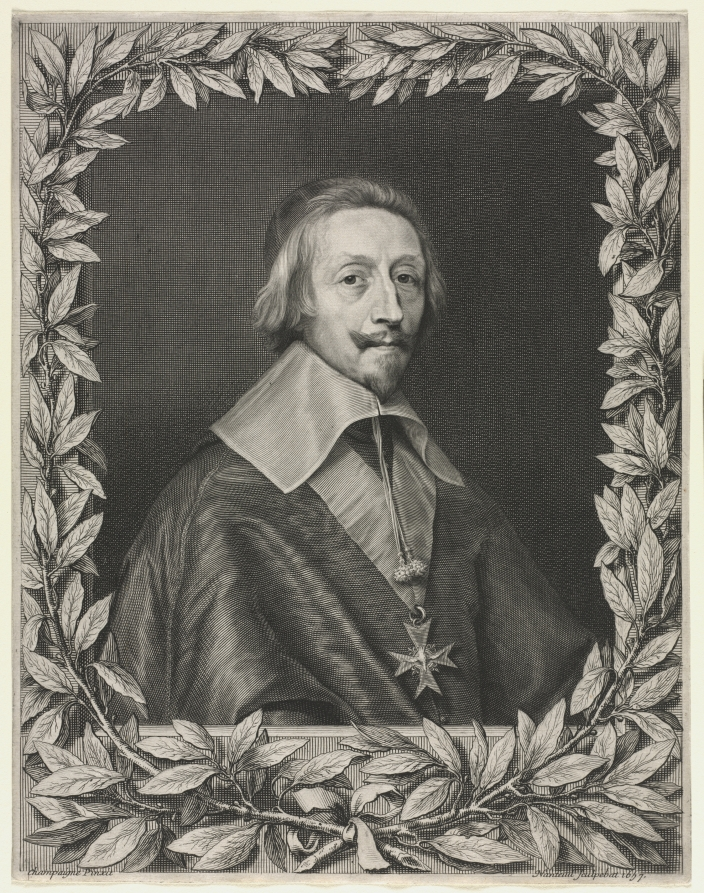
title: Cardinal Richelieu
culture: France, 17th century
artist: Robert Nanteuil (French, 1623–1678)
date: 1657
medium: engraving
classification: Print